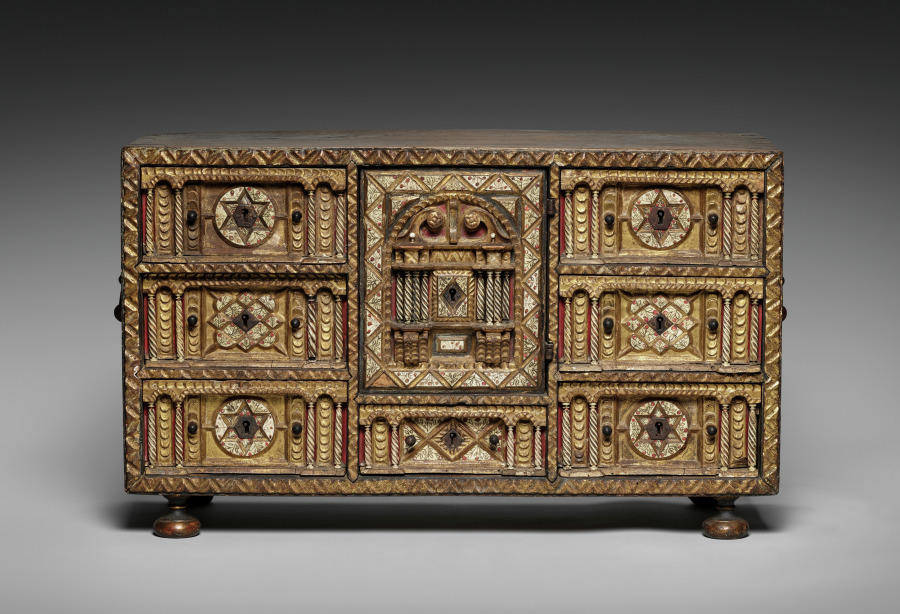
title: Chest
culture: Spain, Colonial, late 17th Century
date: late 1600s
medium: turned and joined wood, gilded and painted red with applied bone columns and bone inlays, wrought iron hardward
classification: Furniture and woodwork